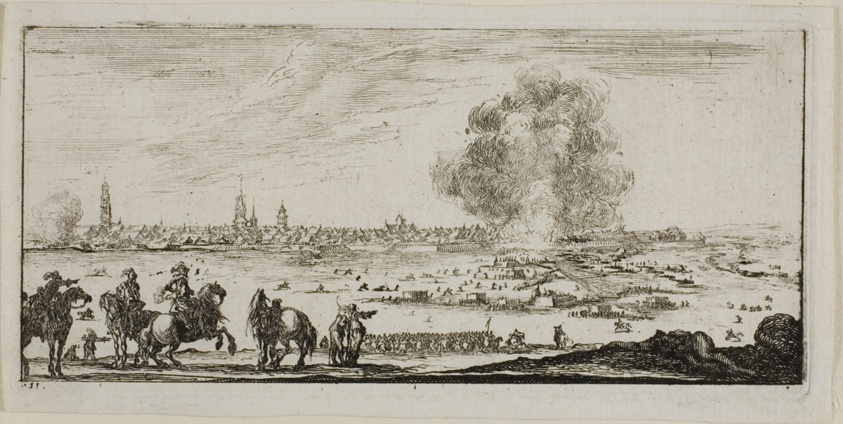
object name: Print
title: Plate Eleven from Drawings of Several Movements by Soldiers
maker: Stefano della Bella (Italian, 1610-1664)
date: 1644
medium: Etching on ivory laid paper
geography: Italy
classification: etching; paper; print; prints and drawing